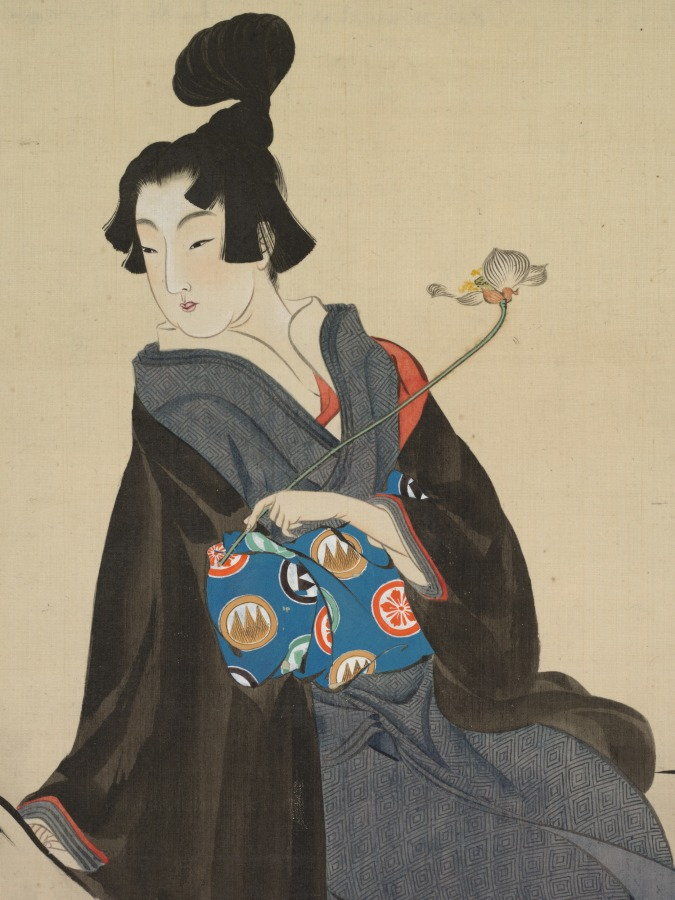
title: Stand-in Fugen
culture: Japan, Edo period (1615–1868)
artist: Kitao Masayoshi (Japanese, 1761–1824)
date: late 1700s–early 1800s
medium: hanging scroll; ink and color on silk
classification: Painting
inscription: artist's signature and two seals, lower right.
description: Here, a woman dressed as a man replaces Fugen, a bodhisattva—a being among those considered enlightened in Buddhism—who symbolizes learning as a path to awakening and typically rides an elephant. The painting teaches the lesson of impermanence through the petals falling from the lotus flower the woman holds. It also alludes to the legend of Eguchi, a 12th-century courtesan who, following an encounter with a Buddhist monk-poet called Saigyō, revealed herself to be a manifestation of Fugen.